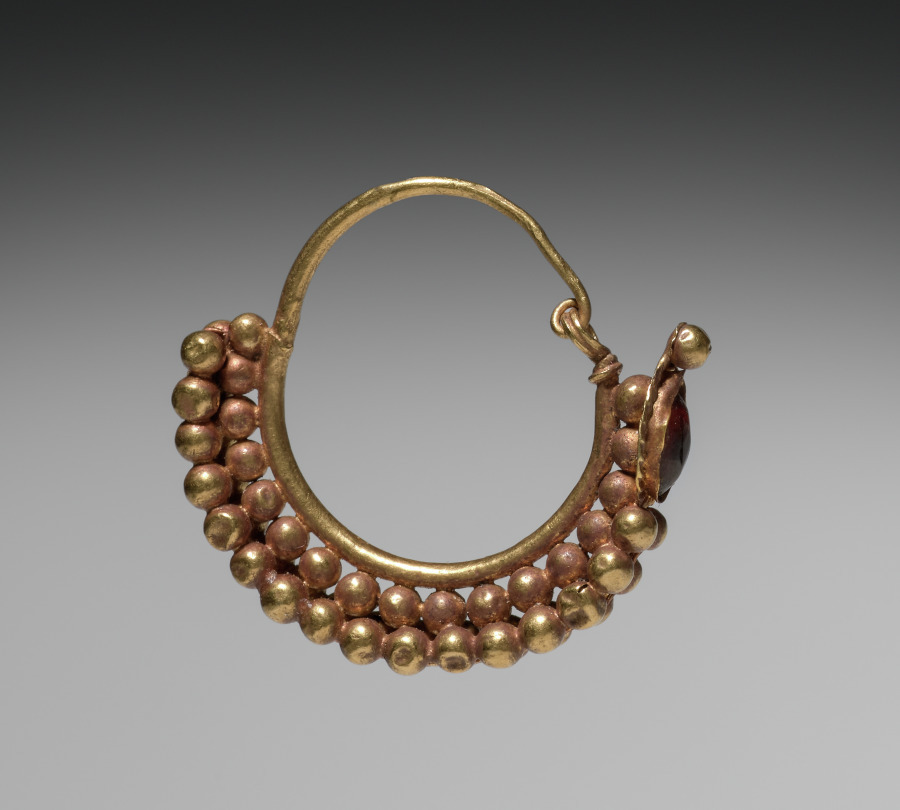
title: Earring (one of a pair)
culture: Syria, Roman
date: 100 BCE–100 CE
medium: gold and garnet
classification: Jewelry